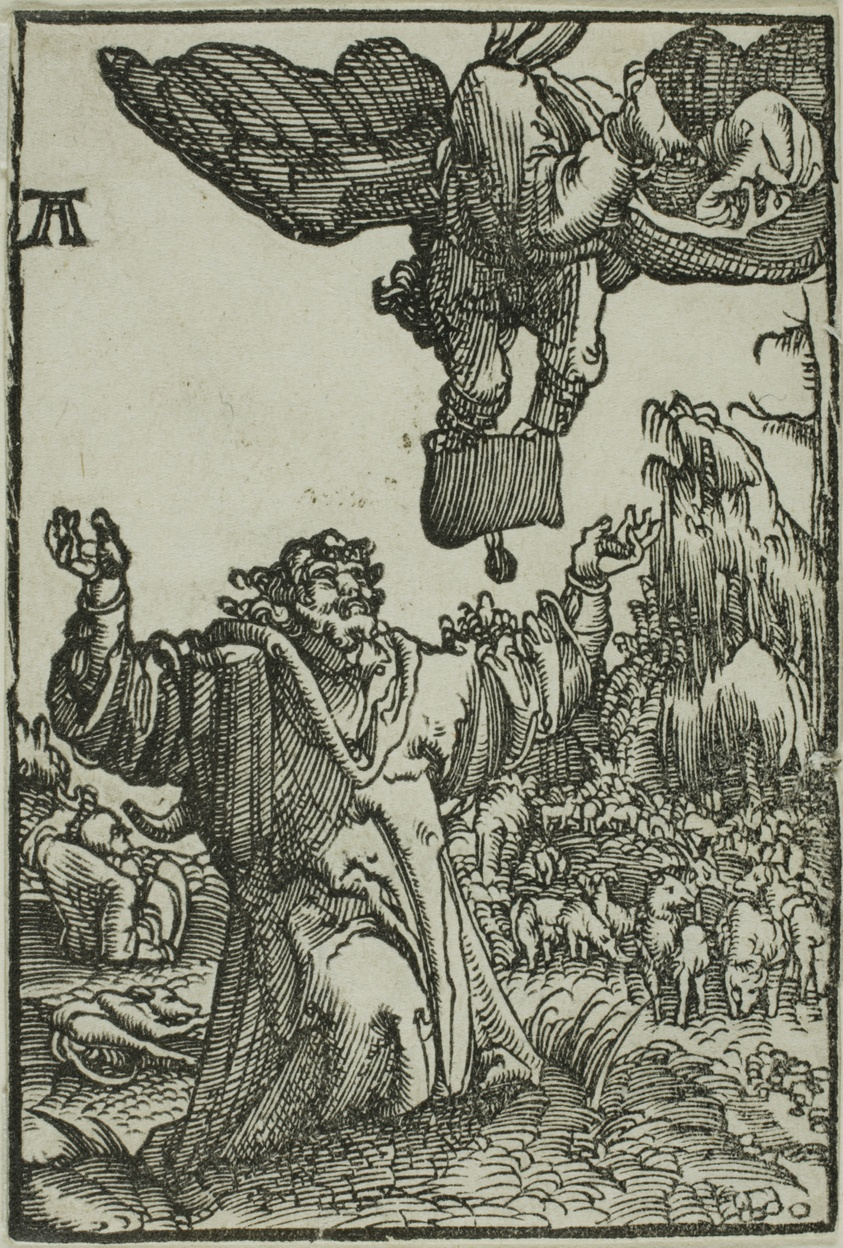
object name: Print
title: The Annunciation to Joachim, from The Fall and Redemption of Man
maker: Albrecht Altdorfer (German, c.1480-1538)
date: 1513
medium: Woodcut in black on ivory laid paper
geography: Germany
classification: wood engraving; print; prints and drawing